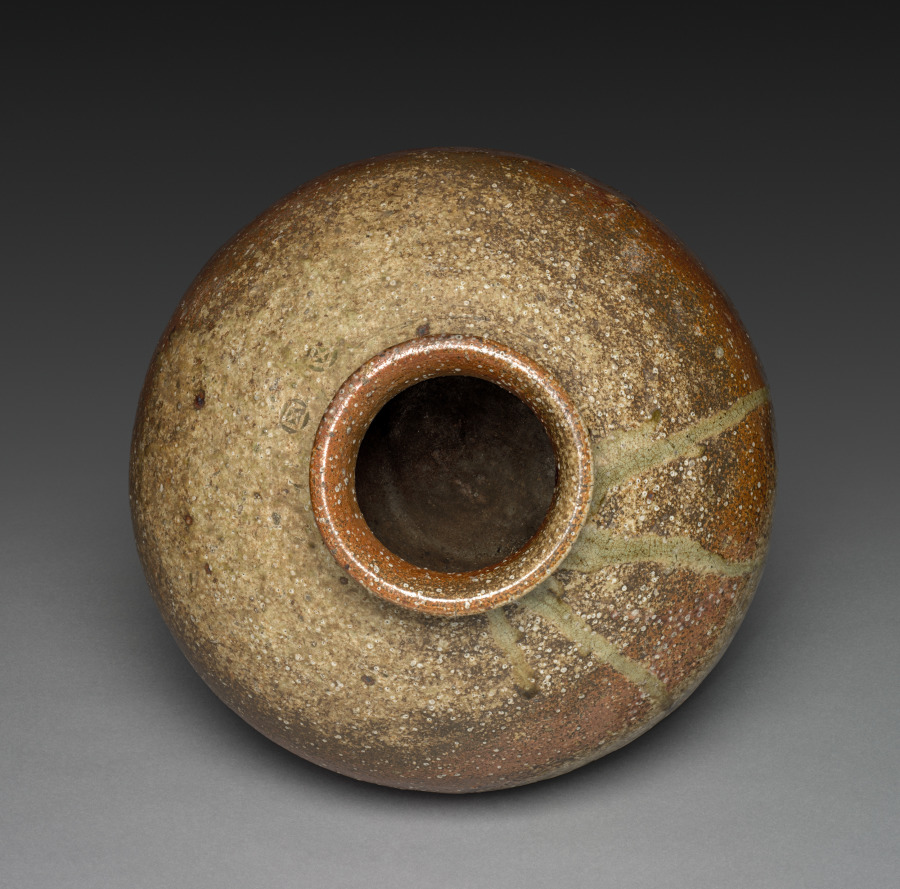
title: Storage Jar (Tsubo)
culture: Japan, Muromachi period (1392–1573)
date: late 1400s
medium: Stoneware with natural ash glaze (Shigaraki ware)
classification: Ceramic